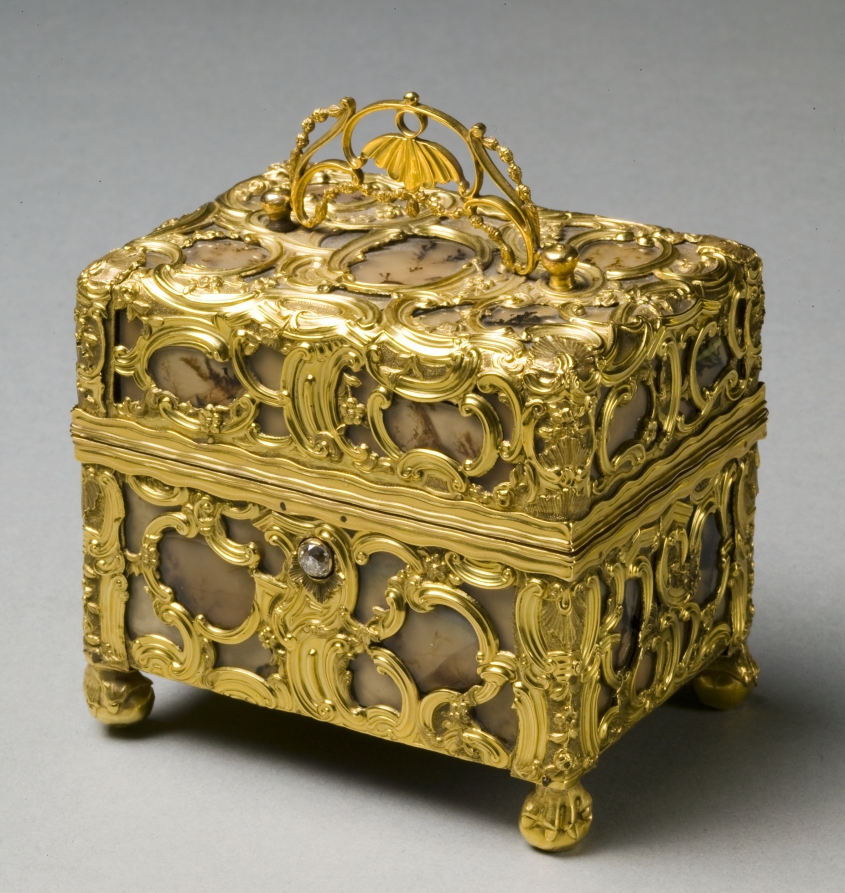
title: Vanity Case (Nécessaire)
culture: England, mid 18th century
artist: or James Barbot (British)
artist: manner of James Cox (British)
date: c. 1750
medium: agate and gold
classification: Miscellaneous